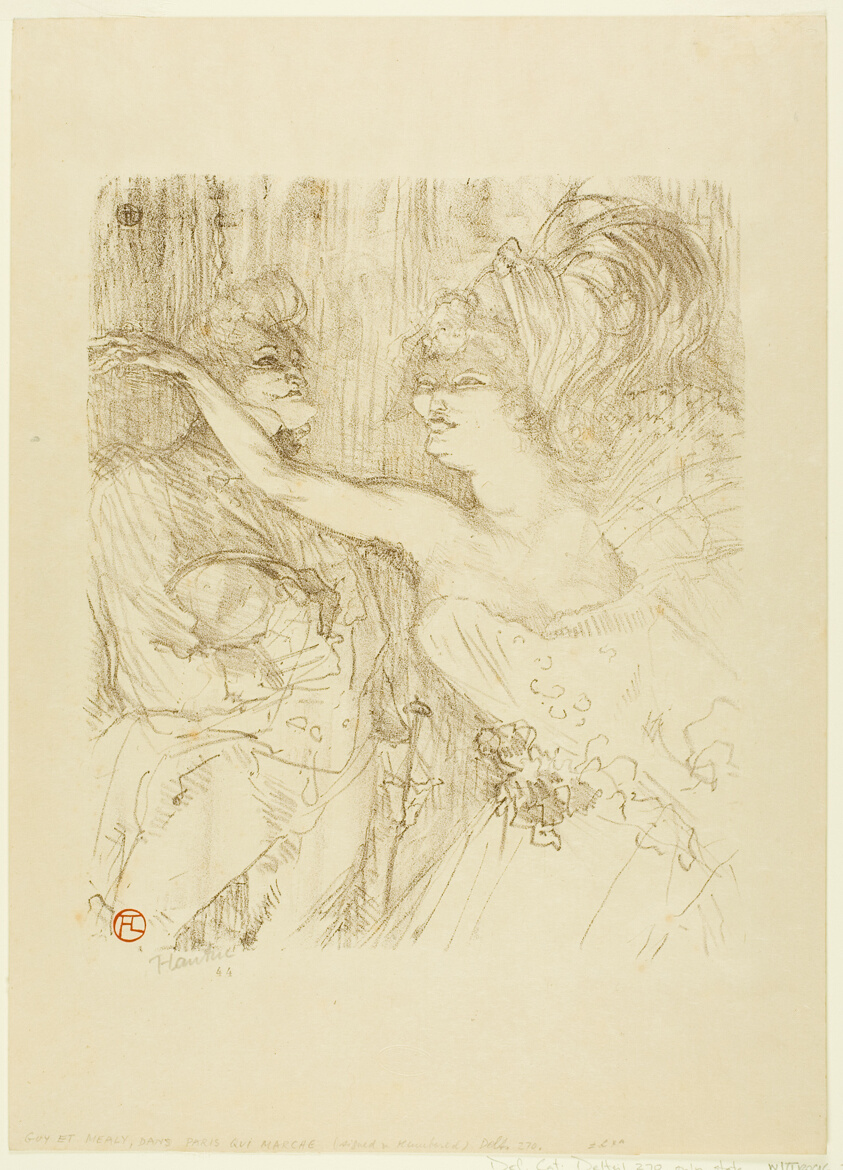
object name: Print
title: Guy and Mealy, in 'Paris qui Marche'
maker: Henri de Toulouse-Lautrec (French, 1864-1901)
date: 1898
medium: Color lithograph on cream wove paper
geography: France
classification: lithograph; print; prints and drawing